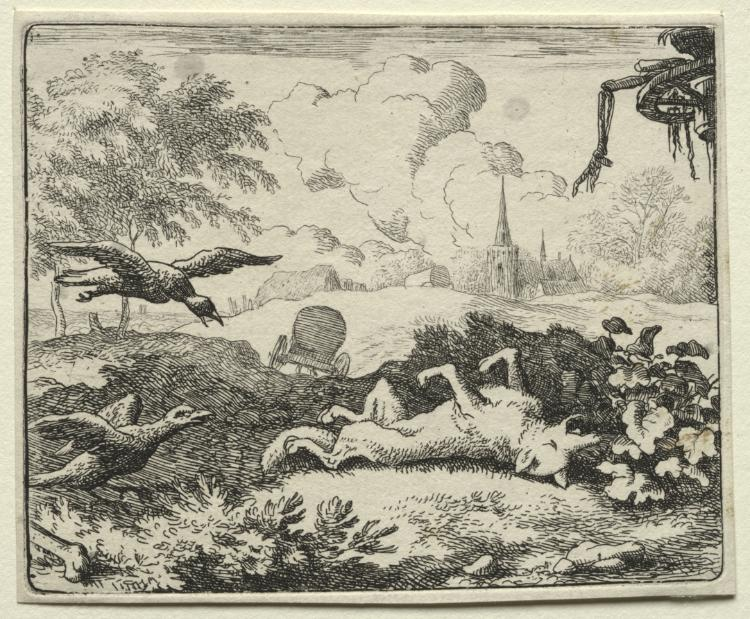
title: Reynard the Fox: Reynard Feigns Death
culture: Netherlands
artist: Allart van Everdingen (Dutch, 1621–1675)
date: 1650–75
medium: etching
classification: Print